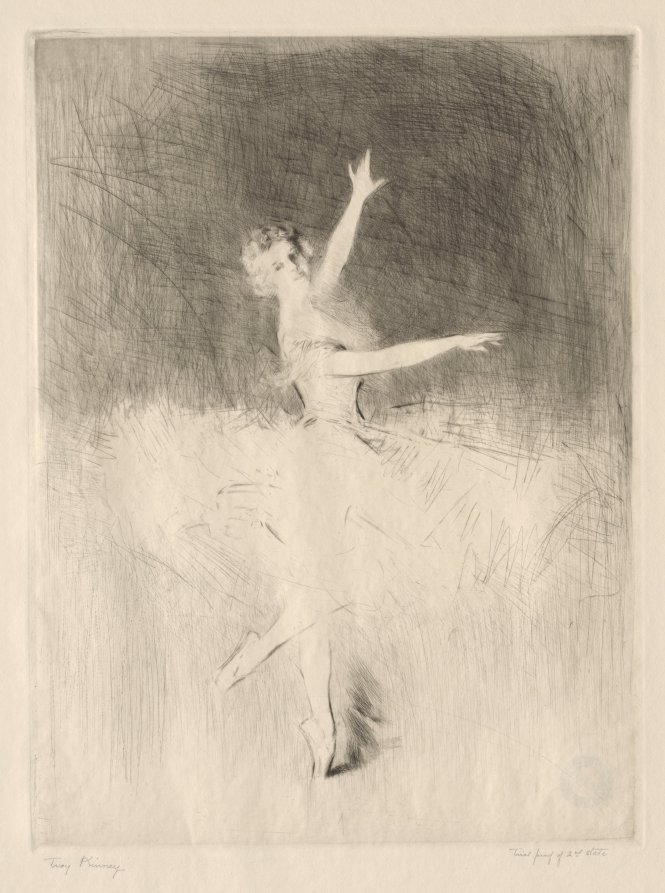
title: Adeline Génee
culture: America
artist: Troy Kinney (American, 1871–1938)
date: c. 1915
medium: etching and drypoint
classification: Print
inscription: Signed in pencil on bottom left beneath image: Troy Kinney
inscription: Signed in pencil on bottom right beneath image: Trial proof of 2nd state